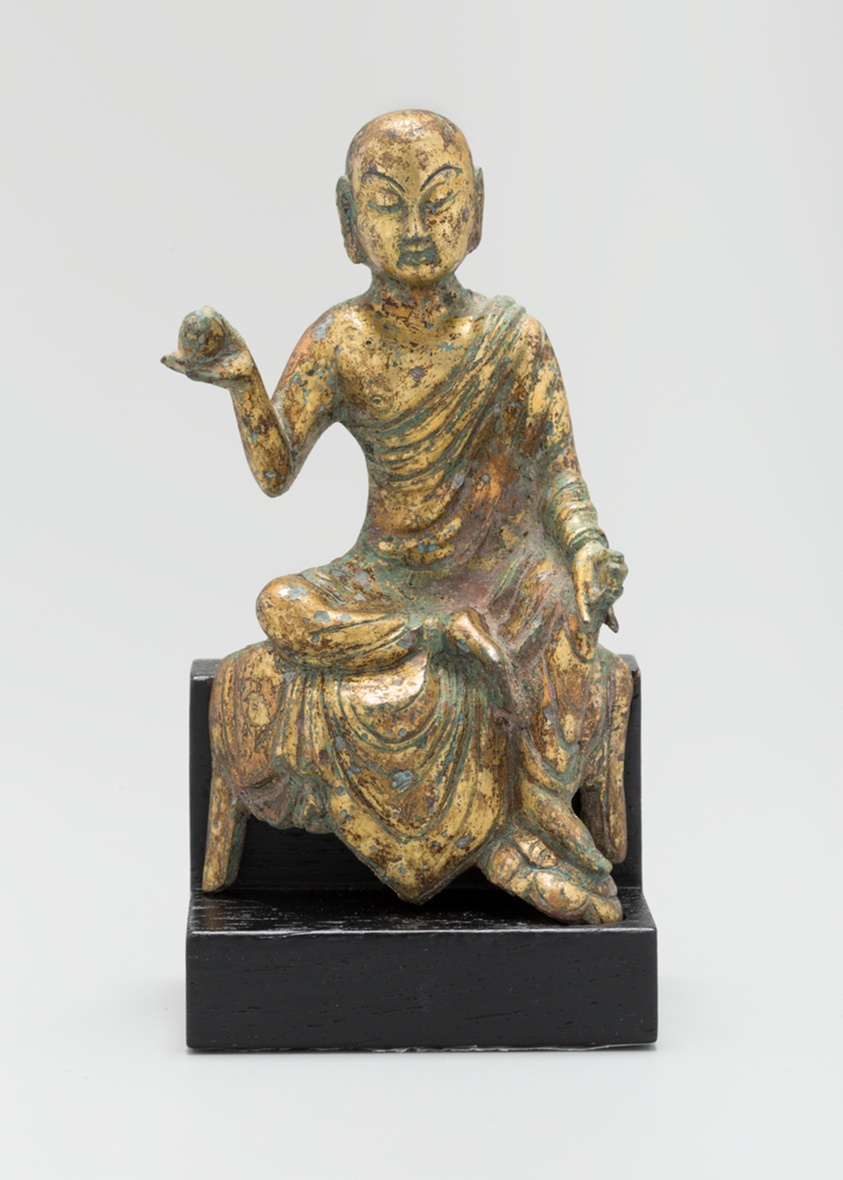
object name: Sculpture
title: Dicang (Khsitigarbha), or "He Who Encompasses the Earth," Seated and Holding a Wish-Bearing Jewel (Cintamani)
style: Chinese (culture or style)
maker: China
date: Tang dynasty (618–907), c. 8th century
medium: GIlt copper alloy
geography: China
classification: bronze; metal; sculpture; asian art